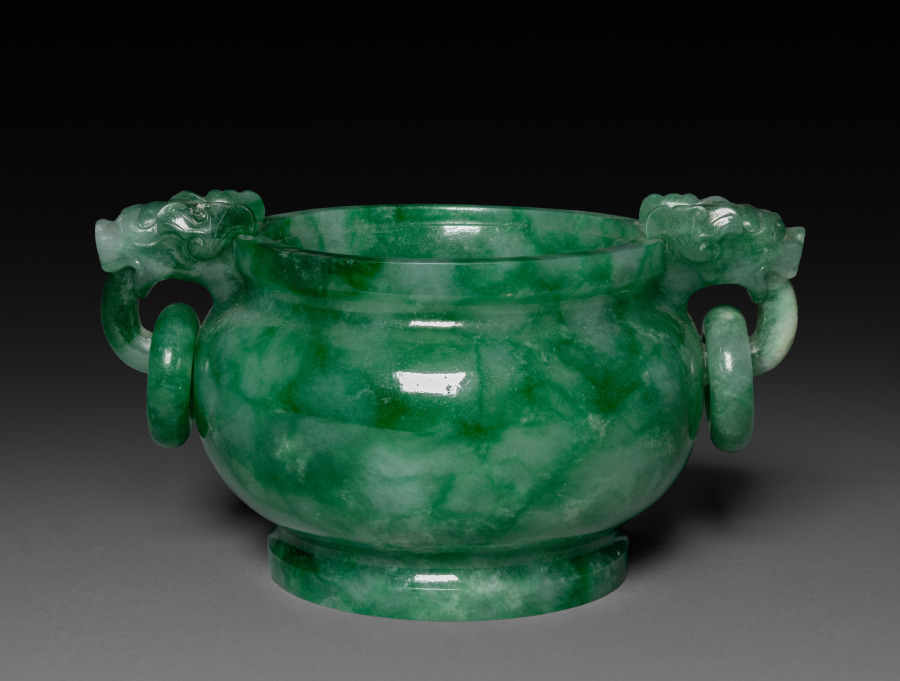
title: Incense Burner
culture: China, Qing dynasty (1644–1911), Qianlong reign (1736–95)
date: 1736–95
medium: green jade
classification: Jade